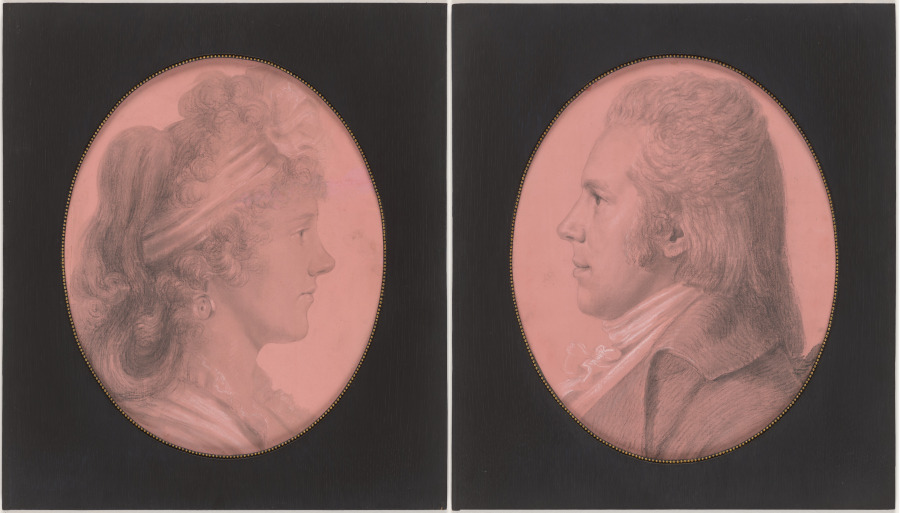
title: Portraits of Georges Arnold Fitzwilliam and Portrait of Eleanor Ramsay Fitzwilliam; a pair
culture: France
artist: Charles Balthazar Julien Fevret de Saint-Mémin (French, 1770–1852)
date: c. 1790–1852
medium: Black and white chalk on buff paper with pink wash in original frames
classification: Drawing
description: This pair of portraits depict George Fitzwilliam, an English merchant, and his American wife Eleanor Ramsay Fitzwilliam, who sat in New York for the French émigré artist Charles Balthazar Julien Févret de Saint-Mémin. Saint-Mémin used a recently invented mechanical device called a physiognotrace to trace accurate profiles of his sitters, which he then completed in black and white chalks. The technology enabled Saint-Mémin to establish a thriving business catering to prominent Americans—including Presidents Washington, Adams, Jefferson, and Madison, Benjamin Franklin, and several Native American chiefs—at a time when he was in exile from the French Revolution. As part of each commission, Saint-Mémin also supplied etchings of the portrait in a reduced size, which could be given as keepsakes to family and friends.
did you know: The physiognotrace device used to create this portrait consisted of a wooden frame within which a sitter posed in profile; the artist then peered through an eyepiece and followed the contour and features of the sitter’s face by maneuvering a graphite pencil attached to the mechanism.